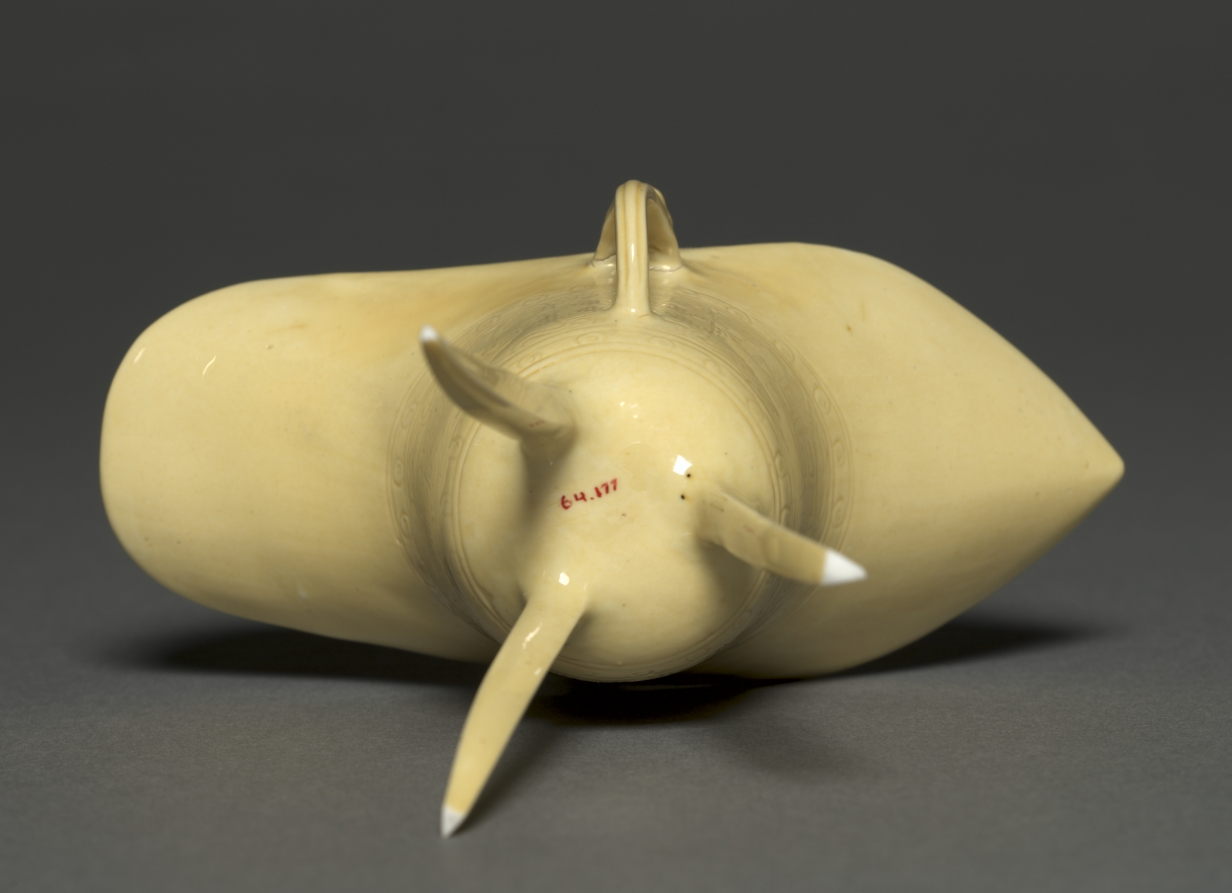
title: Libation Cup in the Form of a Jue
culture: China, Jiangxi province, Jingdezhen, Qing dynasty (1644-1911), Kangxi period (1662-1722)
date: 1662–1722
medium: porcelain with incised and applied decoration and yellow glaze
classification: Ceramic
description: A jue is an ancient Chinese vessel originally designed for serving wine during ceremonies. Bronze jue became prominent during the Shang (c. 1500–1050 BCE) and Zhou (1050–221 BCE) dynasties. This particular piece, made of porcelain during the Qing dynasty (1644–1911), emulates the earlier bronze designs. It reflects the owner's taste for antiquity.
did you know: The handle is decorated with a dragon mask, while the body has a fret pattern in the incised underglaze.